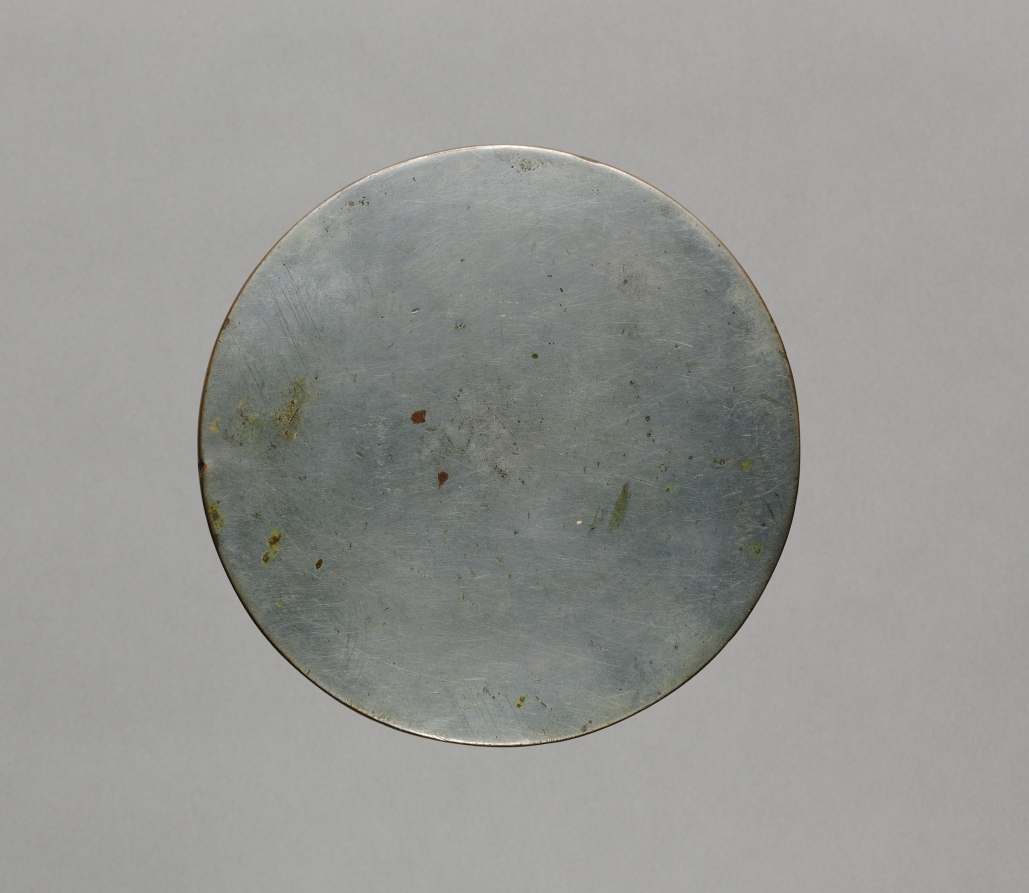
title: Mirror with Pair of Cranes in Chrysanthemum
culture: Japan, Muromachi period (1392–1573)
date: 1400–1573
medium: bronze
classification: Metalwork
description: The Japanese used chrysanthemums as decorative elements on mirrors. In the Heian period, a chrysanthemum with cranes or long-tailed birds was a common motif. Later, in the Kamakura and Muromachi periods, chrysanthemum designs were divided into three patterns with different symbolic associations: Chrysanthemum with Cranes represented longevity; Water Flowing suggested longevity as well as the Noh drama Kikujido, or Chrysanthemum Boy; and East Fence alluded to the poem "Drinking Wine" by Tao Yuanming (AD 365-427). Here, the mirror featuring Buddhist iconography (kyojo) and a chrysanthemum design on the back shows that the flower was also appreciated in the context of Buddhism in the Kamakura period.